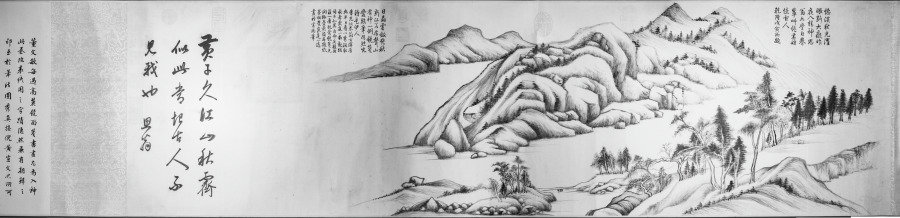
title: River and Mountains on a Clear Autumn Day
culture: China, Ming dynasty (1368–1644)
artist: Dong Qichang (Chinese, 1555–1636)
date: c. 1624–27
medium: Handscroll; ink on Korean paper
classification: Painting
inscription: 黃子久江山秋霽似此，當恨古人不見我也。思翁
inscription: 董文敏每遇高麗鏡面箋，書畫尤為入神。此卷改表紙用之，字跡隱然，兼有朝鮮之印。至於筆法圓秀，真接倪黃。豈文沈所可同日而語也。 康熙庚午中秋後一日，天氣澄爽，重裝初畢，跋於瓶廬。抱瓮翁高士奇。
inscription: Second inscription by Gao Shiqi 高士奇 (1645–1704): On the twenty-third day of the ninth month, the jiaxu year of the Kangxi era [1694], I packed my bags to head north. When my boat passed Wuchang [Suzhou], Mr. Mantang [Song Luo] brought wine to bid me farewell so that we could share our thoughts on our separation in the last few years. I showed him the paintings and calligraphy which I collected and asked his opinions. Since Mr. Mantang does not own any handscrolls by Wenmin [Dong Qichang], I leave this one for him in commemoration of our parting; thus the painting will have a worthy owner and our meeting will become a beautiful story in the future. It is the fourth day after the beginning of winter, with the sky clear and sober. Trees under frost have turned red and yellow, seemingly echoing the brush and ink in the painting. I also ask Mr. Mantang to inscribe a poem to commemorate our meeting so that it will survive forever.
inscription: 1 colophon and 4 seals of Song Luo 宋犖 (1634–1713): Who is the foremost art connoisseur of our dynasty?/ Tangcun [Liang Qingbiao, 1620–1691] is dead, so the title passes to Jiangcun [Gao Shiqi]./ Leaving office, you retired for five years in the Lake region./ Fondling handscrolls and hanging scrolls from morning to evening./ You sent me your collection catalogue Xiao Xia Lu last year;/ It is indeed the true equal of [Zhou Mi's] Yun Yan Guo Yan./ This year you returned to the capital by imperial order;/ Your boat with calligraphy and paintings anchored at the river bank in Suzhou./ When we met each other you did not waste any time for conversation by poured out immediately/ From your "coral net" extraordinary treasures./ You produced incomparable scrolls, with gold-inscribed labels and jade rollers,/ Pouring out from bags and trunks, they were spread in disarray./ Without a word, I rolled and unrolled until my fingers were numbed,/ We sat straight, facing each other quietly, and never felt tired./ For three days we forgot about sleeping and food./ And at times we shouted our joy out loud, forgetting who is host or guest./ Your Dwelling in the Fuchun Mountains and the Yuansheng manuscript/ These peerless works I myself examined with delight./ As an added pleasure to the farewell dinner under the Maple Bridge,/ You allowed me to hold again this handscroll by Dong Qichang--/ The Misty River and Piled Peaks [by Zhao Mengfu] and this Clear Autumn Day are two extraordinary masterpieces./ In showing such life and spirit with "qi yun." the artists were truly "men of heaven."/ The Clear Autumn Day is not even three feet long,/ Painted on tributary Korean paper, it shines like silver./ Every building up and every turn of the mountains imitates nature,/ Every tree and every rock is removed from the commonplace./ From the beginning, the theory of poetry is the theory of painting,/ Like the lotus and the morning sunshine, they complement and refresh each other./ The artist's inscription regrets that "the Old Masters cannot see my scroll."/ Huang Gongwang would have agreed in his grave./ The vermilion of the seals glitter and dazzles the eyes,/ These added accessories are as valuable as jade./ You are very kind to give it to me,/ The feelings expressed in your inscription are so sincere./ Wanting to refuse, but unable, I accept it to respect your wish,/ And taking off my gown and cap I wrapped it with care./ You asked me to write a long poem in commemoration of this beautiful occasion,/ I am too ashamed that my effort in response is so poor and inadequate./ Returning home, I unrolled it under candlelight, trying to write the colophon,/ The light of the waning moon shines at the foot of the mossy wall./ Earnestly humming and brows knit in deep thought, I try to compose;/ The verses are not outstanding, but the facts are real./ With this poem recorded at the end of the scroll, I mail it to you for approval,/ This poem and this painting shall outlast a thousand springs. (Translation by LYSL/HK/WKH)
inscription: 1 colophon and 2 seals of Shao Changheng 邵長蘅 (1637–1704); 2 inscriptions and 14 seals of the Qianlong 乾隆 emperor (r. 1736–95); 1 seal of the Jiaqing 嘉慶 emperor (r. 1796–1820); 3 seals of the Xuantong 宣統 emperor (r. 1908–11); 1 seal unidentified.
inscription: [印] 朝鮮國王之印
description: Dong Qichang had a tremendous impact on the artistic practices and historiography of later generations; his works and writings shaped literati aesthetics. Here, Dong places an abstract landscape composition diagonally across the picture plane, configured to recall earlier masters and simultaneously express his own personal style. Dong’s inscription claims, Huang Gongwang’s Autumn Day, looks like this. I truly regret the master has not seen my work. In fact, Dong Qichang may have had Dong Yuan’s Xiao and Xiang Rivers in mind, a work he owned and considered a key work in Chinese art history.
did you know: The painting has an imprint of a Korean seal that reads "Seal of the king of Joseon."